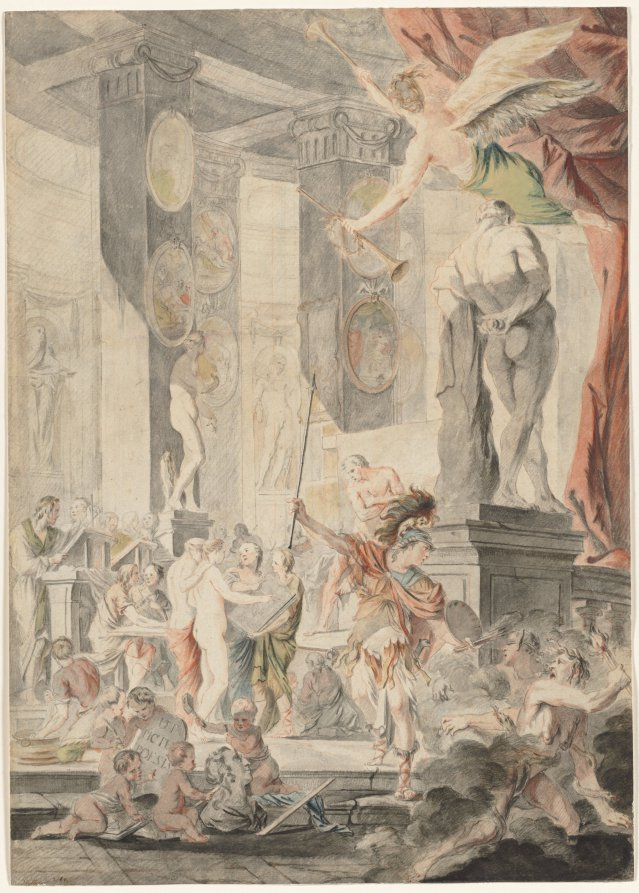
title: Ut Pictura Poesis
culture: France, 18th century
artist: Charles-François Hutin (French, 1715–1776)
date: 1745–1746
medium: Gray wash, watercolor, graphite, black chalk, and red chalk on cream laid paper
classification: Drawing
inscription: lower left, in brown ink: Natoire [4?][illegible]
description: Hutin’s drawing is an allegorical celebration of academic artistic training. The words UT PICTURA POESIS engraved on the stone tablet translate “as is painting, so is poetry.” Classical figures throughout the grand hall discuss their work as they practice different methods of making images. In the foreground, putti sculpt a portrait bust of Louis XV; behind them artists practice drawing a nude model. Among the sculptures in the room are the Farnese Hercules and the Venus de’ Medici, both famous Roman marbles in Italy, where Hutin trained from 1737 to 1742. In the upper right, Fame flies with trumpets above Minerva, the patron goddess of the arts, holding a paintbrush and palette as she drives out Ignorance and Envy.